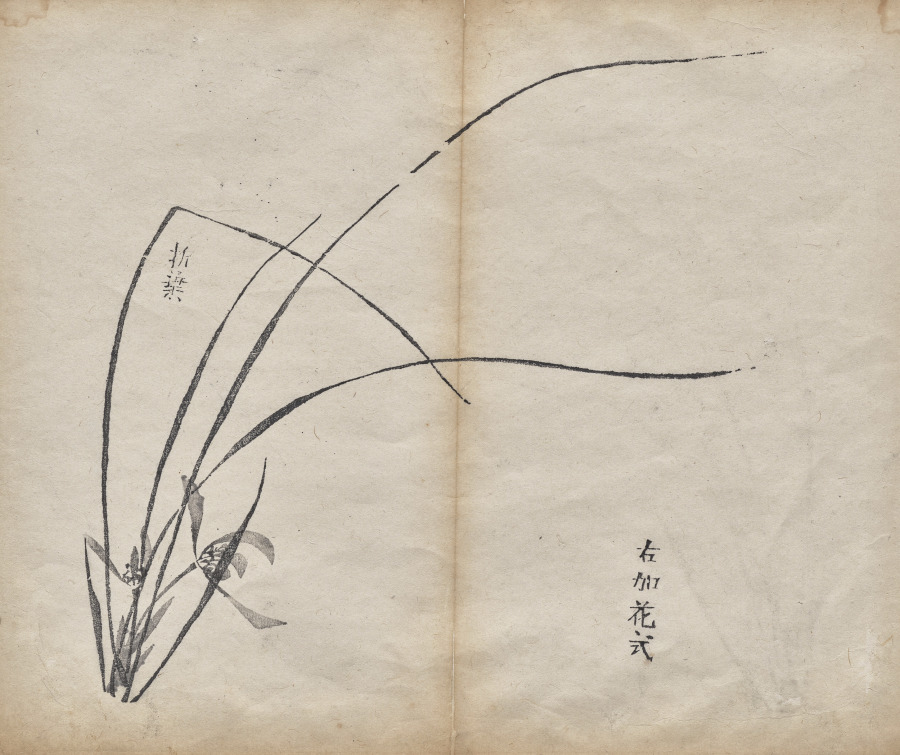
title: Untitled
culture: China, Ming dynasty (1368–1644)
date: 1625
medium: color woodblock print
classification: Print